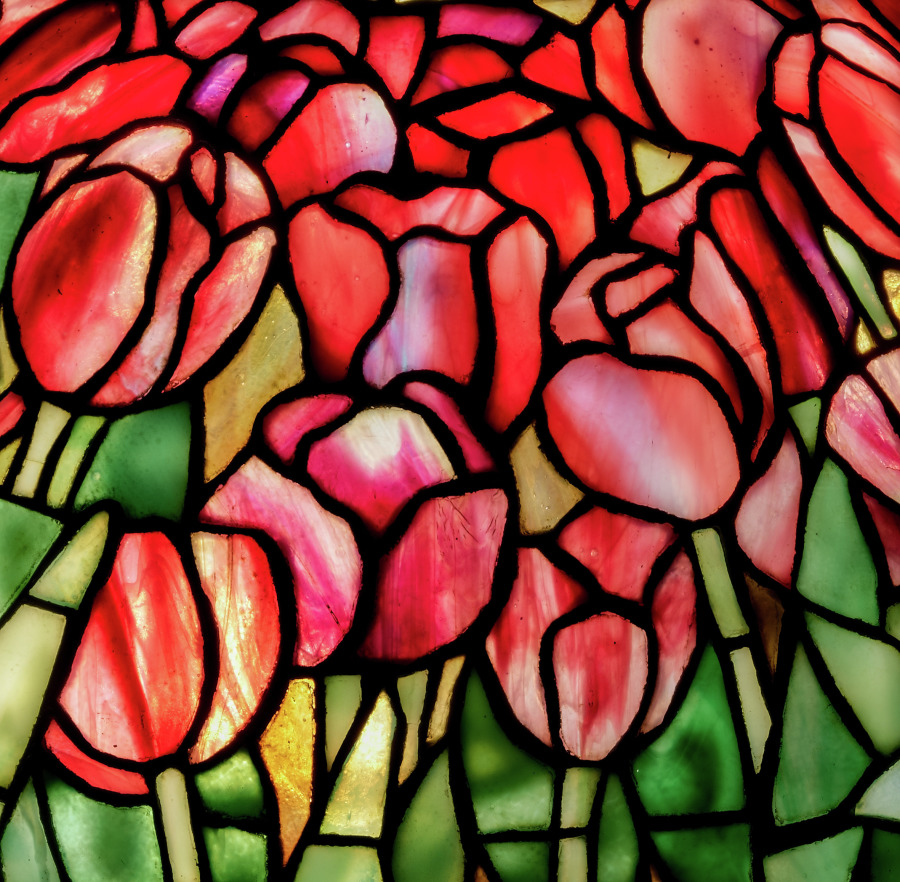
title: Tulip Table Lamp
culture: America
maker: Tiffany Glass & Decorating Company (America, New York, 1892–1902)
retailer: Tiffany Studios (United States, New York, 1902–32)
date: c. 1900–1906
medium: Leaded glass, blown glass, bronze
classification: Lamp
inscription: Shade impressed: TIFFANY STUDIOS NEW YORK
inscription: Base impressed: TGDCo/TIFFANY STUDIOS/NEW YORK/21667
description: In the 1870s a renewed emphasis on natural landscapes ushered in a generation of cottage gardeners who delighted in planting perennials in large quantities. Louis Comfort Tiffany was among those who championed the lush, sometimes wild-looking displays of varied floral species in the garden at his Long Island estate, Laurelton Hall. Tiffany encouraged his designers to take inspiration from his garden by shipping fresh cuttings almost weekly to his studios. Ohio native Clara Wolcott Driscoll and her team of female designers created floral patterns for lamps and mosaics based on the colorful blooms of spring that became among the most sought after and commercially successful of Tiffany’s production.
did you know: Many of Louis Comfort Tiffany's lamp shades such as this tulip version were designed in standard sizes so that they could be used on different bases.